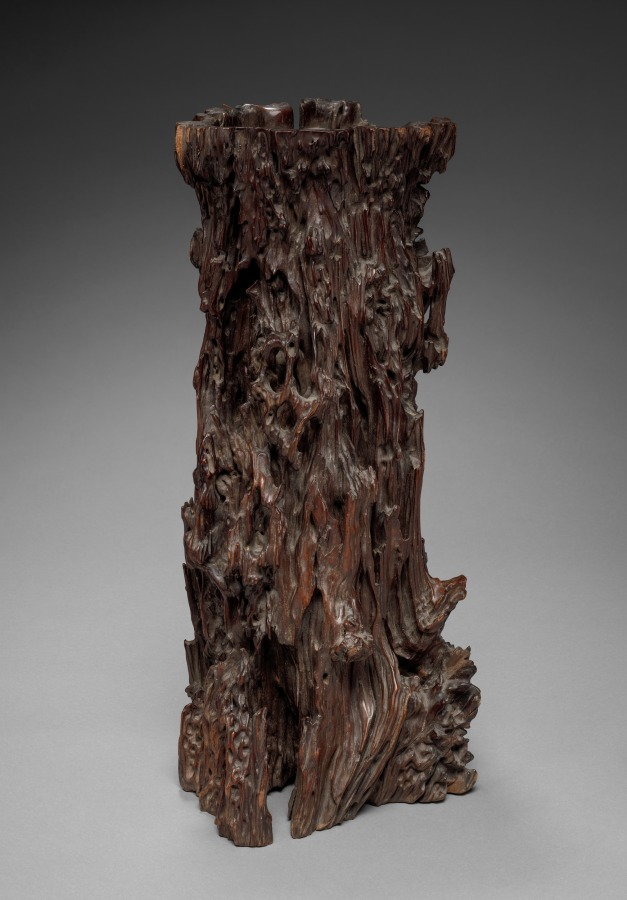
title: Prunus Wood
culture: China, Qing dynasty (1644-1911)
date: 1700–1899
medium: wood carving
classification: Wood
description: The gnarled and twisted form of a prunus stump is carved to accentuate its naturally textured surface. The body is finely polished to create a lustrous patina. Simple wood carvings like this exemplify the Chinese scholars’ taste for natural forms and rustic materials, which in turn reflect the desire to retreat into nature. They were collected and displayed as decorative works of art in the traditional scholars’ studios.